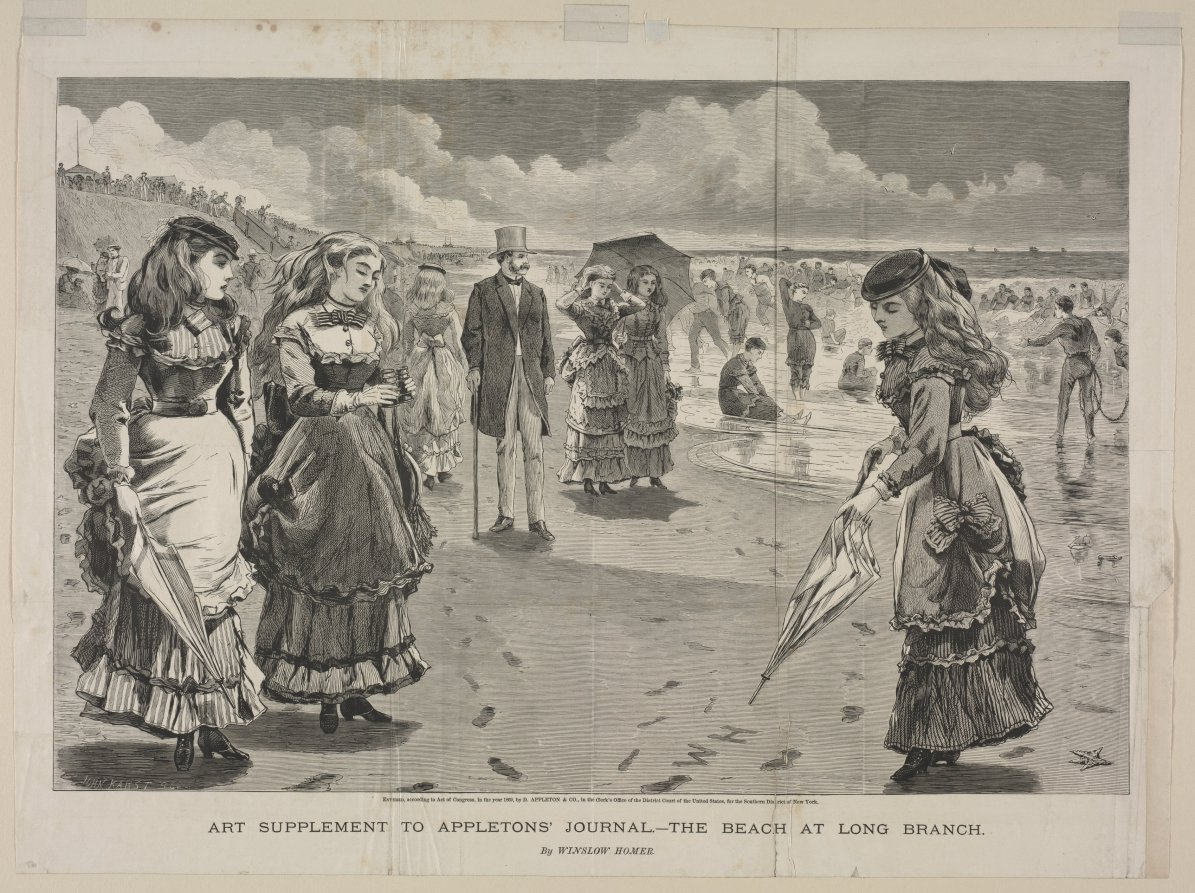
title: The Beach at Long Branch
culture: America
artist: Winslow Homer (American, 1836–1910)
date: 1869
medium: wood engraving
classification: Print